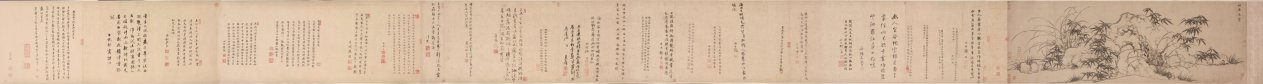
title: Bamboo, Rocks and Lonely Orchids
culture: China, Yuan dynasty (1271-1368)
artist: Zhao Mengfu (Chinese, 1254–1322)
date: 1271–1368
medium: Handscroll; ink on paper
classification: Painting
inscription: 竹石幽蘭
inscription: 孟頫為善夫寫. [印] 趙氏子昂; [印] 松雪齋; [印] 天水郡圖書印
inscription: 古人善書者必能畫點墨作蠅，便自有生意。松雪翁蘭石草聖飛帛筆法皆具，可寶也。安陽韓性 [印]明善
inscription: Colophon 2. Qiu Yuan 仇遠 (1247-after 1328), a respected poet during the Song and Yuan periods. He was linked to, among others, Zhao Mengfu and Gao Kegong. Zhao Mengfu painted a version of Nine Songs 九歌圖 for him, and Gao Kegong dedicated to him a painting titled Mountain Village 山村圖 (current whereabouts unknown). His poem here is also preserved in his collected works.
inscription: Colophon 3. Zheng Yuanyou 鄭元祐 (1292-1364), an erudite scholar and teacher of renown, active in Hangzhou and Suzhou. In the 1350s, when Gu Ying’s literary gatherings were at their peak, he was already elderly and participated in a limited way.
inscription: Colophon 4. Wu Kegong 吳克恭 (active mid-1300s), a friend of Gu Ying and Ni Zan 倪瓚 (1301–1374), a major Yuan painter.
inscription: Colophon 5. Angji 昻吉 (jinshi of 1348), of Western Xia 西夏 origin and a poet of distinction. He wrote an introduction to the painting Literary Gathering at Yushan 玉山雅集圖, of which Zhang Wo was the painter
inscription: Sheet 2. Yuan: friends of Gu Ying Colophon 6. Wang Zifang 王孜方 (active mid-1300s), an official who, at the time of his visits to Gu Ying’s estate, had reached the rank of Minister. He is better known under the name Wang Keju 王可矩.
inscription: Colophon 7. Ke Jiusi 柯九思 (1290–1343), a major official who served in the Kuizhang Pavilion 奎章閣 and as an advisor to Emperor Wenzong in matters of calligraphy and painting.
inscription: Colophon 8. Yu Li 于立 (active mid-1300s), a Daoist recluse, poet, and close friend of Gu Ying, so much so that during his visit to Gu Ying’s estate he was given accommodation in a special pavilion. His poem here is also preserved in Gu Ying’s Cao tang ya ji.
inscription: 至正十一年十月廿八日男奕百拜堇觀 [印] 趙奕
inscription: Colophon 10. Yu Ji 虞集 (1272-1398), a major official and literary figure who also served in the Kuizhang Ge. His poem is recorded in his collected works. The poem is one of a set of four inscribed at the request of Wang Huayu 汪華玉 on Orchids and Rock 蘭石圖 by Zhao Mengfu, obviously a different, long lost, painting. Wang Huayu was an official and a collector (jinshi of 1327). Yu Ji’s colophon here was written before 1348 and during his retirement in Linchuan 臨川, Jiangxi, possibly sent from there. It is possible he had not seen the painting, and his calligraphy here appears to be rather casual and detached, jotting down an old poem without much care, contrary to his earlier practice.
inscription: Colophon 11. Sun Shi 孫時 (mid-1300s–early 1400s), a native of Yuncheng 鄆城, Shandong, and a jinshi of 1390. He may have been quite young when paying a visit to the Yushan gatherings in the late 1340s and early 1350s.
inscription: Colophon 12. Zhang Zhu 張翥 (1287–1368), Qiu Yuan’s disciple and a poet of renown, who enjoyed a belated career in officialdom and was known for his integrity.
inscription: Sheet 4. Yuan and Ming: further friends of Gu Ying; colophon 17 begins the early Ming sequence. Colophon 13. Zhang Wo 張渥 (active c. 1336-after 1364), a frustrated scholar, a poet, and a painter of landscape and figures. An active participant in Gu Ying’s literary circle, he painted the Literary Gathering at Yushan, a pictorial document of the individuals and activities on Gu Ying’s estate. His rendering of Nine Songs is well known, and one version is in the collection of the Cleveland Museum of Art (see 1959.138). His poem here is also found in Gu Ying’s Cao tang ya ji, under the entry “ti Zhao Hanlin mo lan 題趙翰林墨蘭” (inscribed on the Ink Orchid by Zhao the Hanlin academician). This is a rare instance of calligraphy as well as signature by the artist.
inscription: 觀吳興公竹石幽蘭圖使人鄙吝頓消。其筆勢從橫天真爛澷，一出於二王書法。冝仲瑛寳而玩之異於常品也。至正八年十月天台陳基書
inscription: Colophon 15. Zhang Shen 張紳 (active about 1340–after 1385), a respected calligrapher and participant in Gu Ying’s literary gathering. He resided in Kunshan, the same city where Gu Ying’s estate lies. In the third line of the poem, he mentioned Gu Ying’s hao, “Jinsu 金粟.” This was a name he assumed later in life, after the death of his mother in the year 1356. Thus this inscription must have been written after that date.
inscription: Colophon 16. Wang Sun 汪遜 (active mid-14th century), a little-known native of Kuaiji 會稽, who may have been one of the infrequent visitors to Gu Ying’s estate.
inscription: Colophon 17. Hu Guang 胡廣 (1370-1418) is the first Ming colophon writer on this scroll. He was an official of great power in the court and a trusted advisor of Emperor Chengzu; he served as the Grand Academician of the Hall of Literary Profundity 文淵閣大學士 and Grand Academician of the Left Secretariat of the Heir-Apparent 左春坊大學士.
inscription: Sheet 5. Early Ming Colophon 18. Wang Yinshi 王尹實 (active about 1403–about 1424), a native of Siming 四明, Zhejiang, and a minor official and calligrapher.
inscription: Colophon 19. Zhang Yuchu (signed here as “Wuwei 無 為”), the forty-third Heavenly Master of the Zhengyi sect of Daoism. A man of erudition, he was also a poet, painter, and calligrapher. A modified version of the poem here was published in his collected works titled Xian quan ji 峴泉集. A slight modification in the first line is the only change: “Wu xing miao yao nian bing xue zi 吳興玅年氷雪姿.”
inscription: Colophon 20. Yao Guangxiao 姚廣孝 (1335-1418), a Buddhist monk, scholar, and counselor to Chengzu in his successful attempt at usurpation of the throne. Yao Guangxiao was a controversial figure but wielded enormous power.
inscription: Sheet 6. Wang Ning alone Colophon 21. Wang Ning 王寧 (d. 1411) signed as “Qingzhen 清真” in this colophon. One of the three seals reveals his identity as the Yongchun Hou 永春侯 [Marquis of Lasting Spring] (appointed 1402), and the husband of Princess Huaiqing 懷慶公主 (1328-1398), the sixth daughter of the founder of the Ming dynasty, Zhu Yuanzhang. This colophon postdates 1402.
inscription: Sheet 7. Mid-Ming Colophon 22. Ou Yi’an 區易安 (active first half of 15th century), unknown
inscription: Colophon 23. Chen Lian 陳璉 (1370-1454), a native of Dongguan 東莞, Guangdong 廣東, and an official admired for his erudition and perspicacity. In view to the known calligraphic style of Chen Lian, this colophon appears to be a transcription and not written by him.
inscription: Colophon 24. Wei Ji 魏驥 (1374-1471) enjoyed longevity (he lived to the age of ninety-eight) and an extended length of service as an official. A jinshi of 1406, he eventually became the Minister of Personnel in Nanjing 南京吏部尚書. The colophon here is dated 1434, when he was invited to view the painting by the Court Musician Mo Zhizhong 莫至翀, its owner. Again, in view of its calligraphic style, this was not written by him, but is a transcription from the original.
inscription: Colophon 25: Zhang Yi 章鎰 (active 1462-1473), a Ningbo native and an official with a reputation for courage and integrity.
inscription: Sheet 8. Further mid-Ming Colophon 26. Yin Zhi 尹直 (1427-1511), a controversial figure in Ming politics in spite of his erudition and high position as the Minister of War 兵部尚書.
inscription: Colophon 27. Zou Yu 鄒虞 (active 1460-1520; jinshi of 1490), a native of Hangzhou. In 1510, he was appointed Administrative Vice Commissioner in Guangdong.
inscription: Sheet 9. Xu Shouhe 徐守和 alone Colophon 28. Xu Shouhe 徐守和 dated his entry in 1629. Since he wrote it in his own studio, The Lesser Qingbi Pavilion 小清閟, he was likely the owner of the scroll. Xu’s life is not well documented; he was a connoisseur of note during the last years of the Ming dynasty rule. He may have acquired the Cleveland scroll from Wu Ting, whose seals appear here.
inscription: Sheet 10. The mounter’s note. Xu Shudong 徐曙東 of Jiaxing 嘉興 made the remounting on the first day of sixth month, 1802.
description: Bamboo and orchids are motifs associated with the virtues of the scholar-official. Bamboo that bends but does not break stands for moral integrity, endurance, and loyalty. Wild, fragrant orchids that bloom in the shadow symbolize modesty and the aura of learnedness. Rocks are often considered to be miniature versions of mountains that form the universe. This monochrome ink painting is brushed on paper in a masterfully calligraphic manner. While the rocks are delineated in chalky, dry strokes showing the effect of flying white (feibai), the bamboo and orchids are drawn with a swift brush demonstrating the virtuosity of the artist.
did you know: One of the many inscriptions records that the handscroll was last remounted by Xu Shudong 徐曙東 of Jiaxing 嘉興 in 1802.